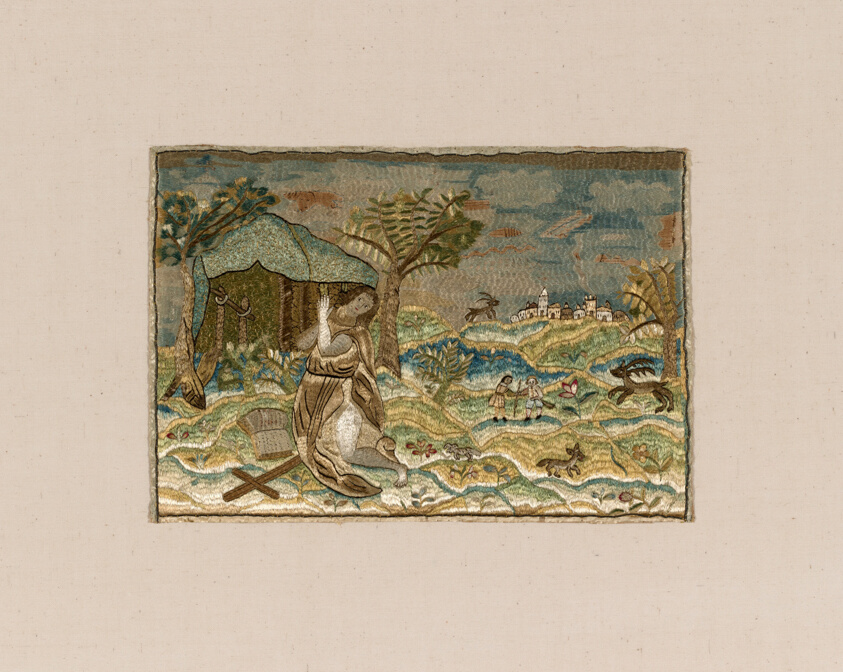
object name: Textile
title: Picture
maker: England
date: 17th century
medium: Linen, plain weave; embroidered with silk in satin, single satin, split and stem stitches; laidwork and couching; edged with psilk, plain weave with supplementary patterning warps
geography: England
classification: textile; needlework (visual works)